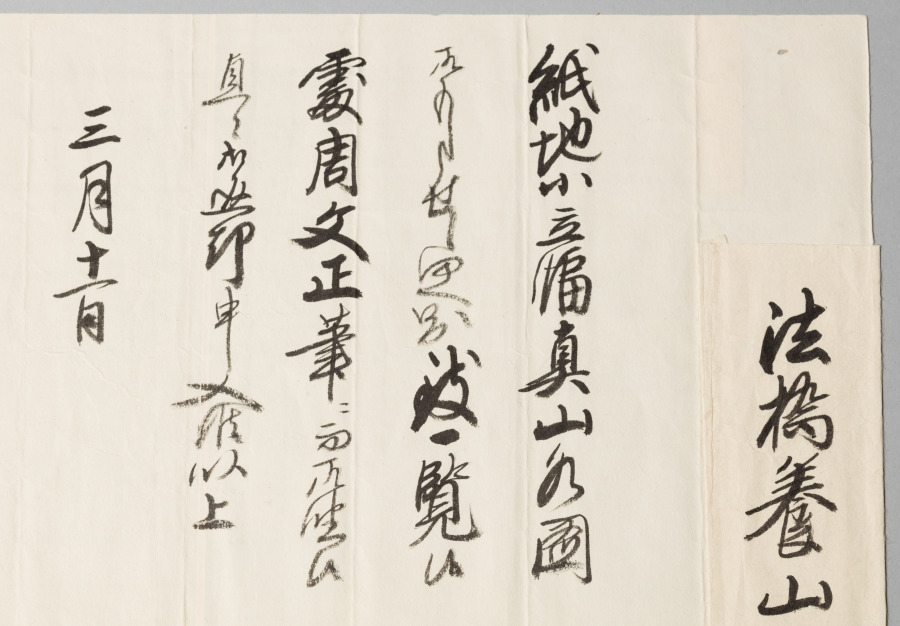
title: Landscape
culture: Japan, Muromachi period (1392–1573)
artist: attributed to Kenkō Shōkei (Japanese, active 1478–1506)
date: late 1400s–early 1500s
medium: hanging scroll, ink and light color on paper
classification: Painting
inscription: inscription above signed Shō'u Kojin; calligraphy by the Shokōji priest Tōgan Zuisen 桃源瑞仙 (1430–89)